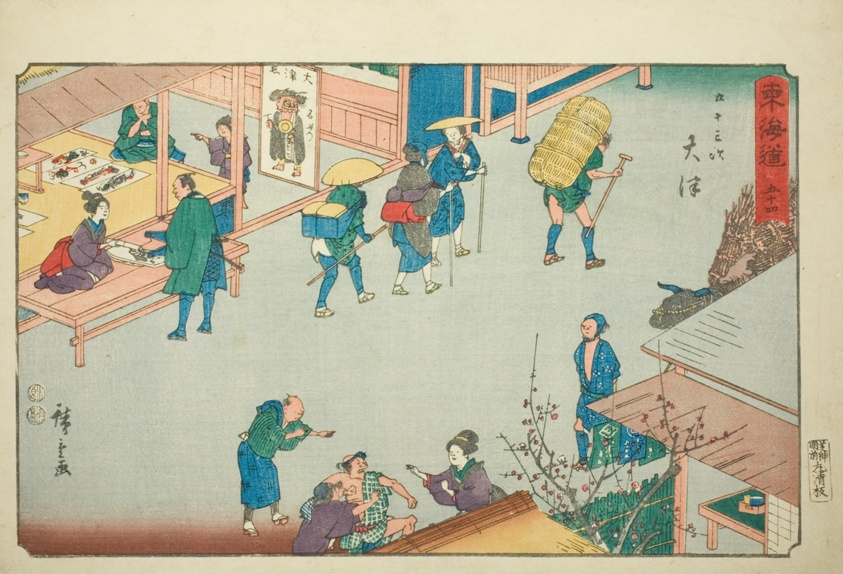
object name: Print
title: Otsu—No. 54, from the series "Fifty-three Stations of the Tokaido (Tokaido gojusan tsugi)," also known as the Reisho Tokaido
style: Japanese (culture or style)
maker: Utagawa Hiroshige 歌川 広重; Japanese, 1797-1858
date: c. 1847/52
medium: Color woodblcok print; oban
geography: Japan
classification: woodblock print; print; asian art